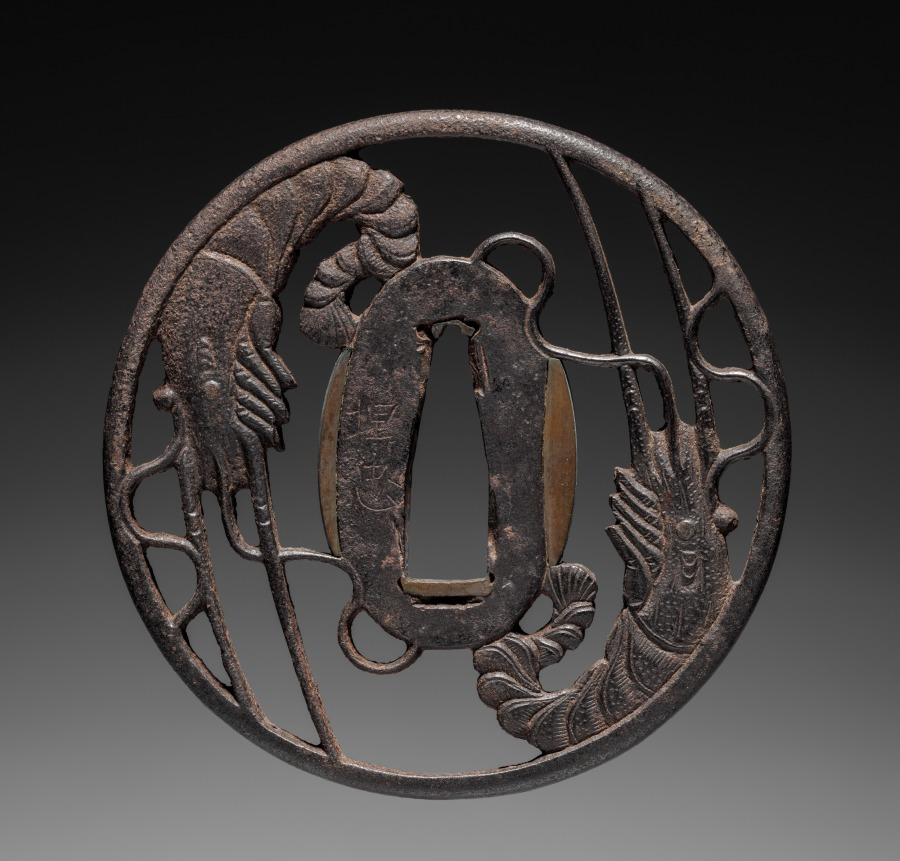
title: Sword Guard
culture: Japan, Edo period (1615–1868)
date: 1700s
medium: iron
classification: Arms and Armor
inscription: Signature: Umetada, residing at Nishijin, Yamashiro province